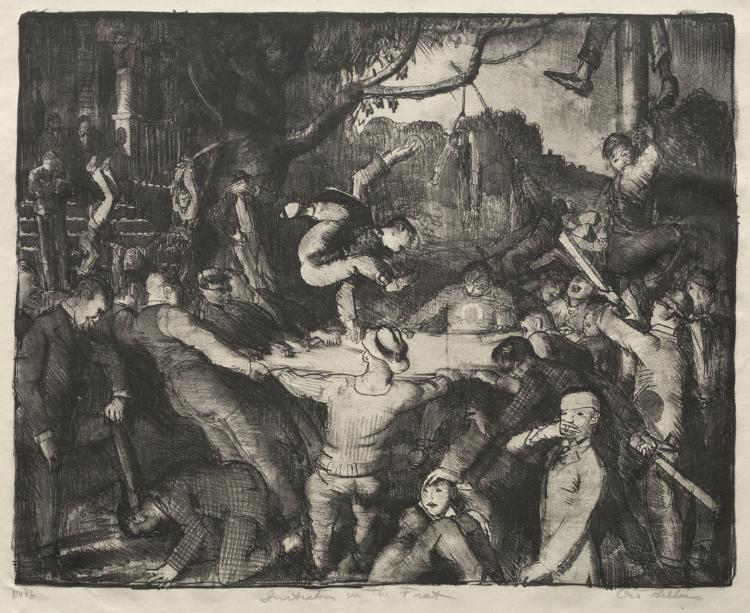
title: Initiation in the Frat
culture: America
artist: George Bellows (American, 1882–1925)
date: 1917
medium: lithograph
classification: Print